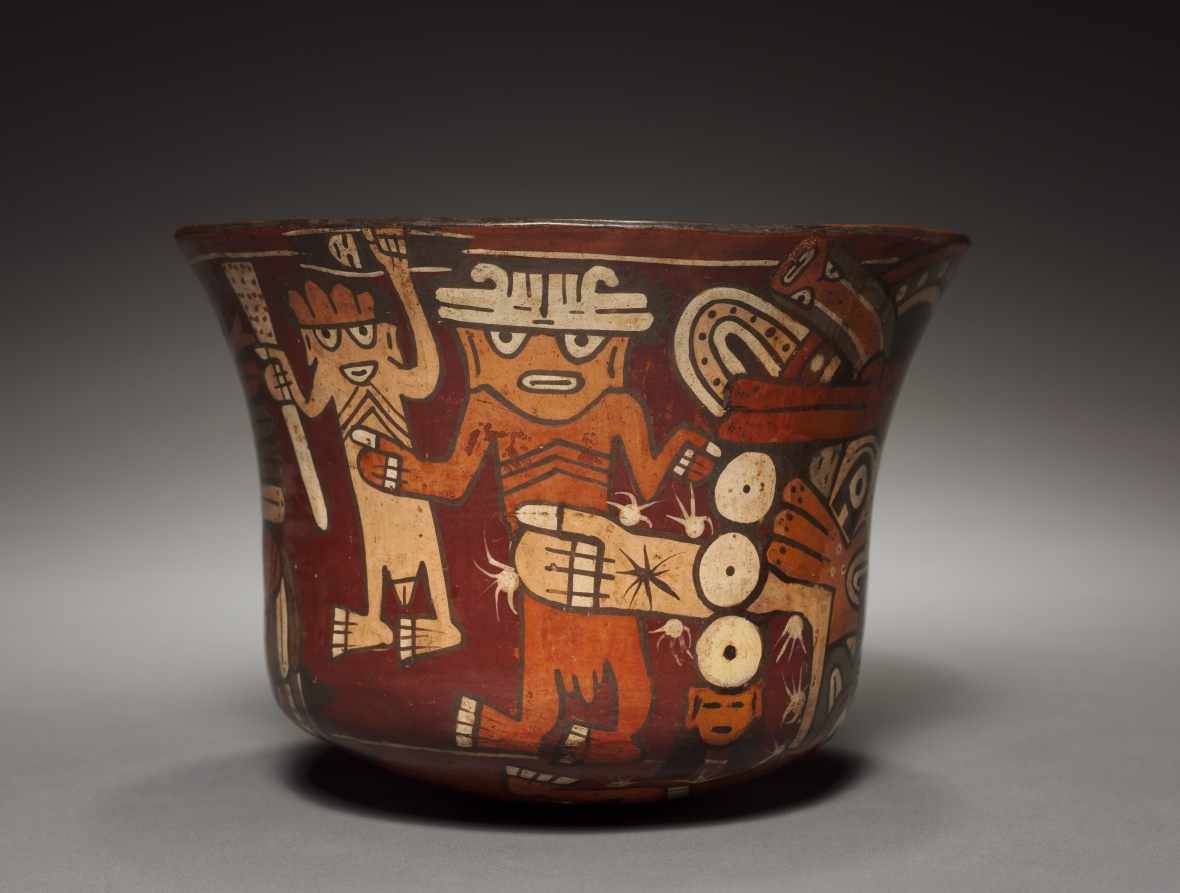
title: Bowl with Costumed Being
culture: Peru, South Coast, Nasca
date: 100 BCE–700 CE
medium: earthenware with colored slips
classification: Ceramic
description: Supernatural figures like the one on this bowl are shown wearing ornaments that actually exist-like the nearby Mouth Mask-they may represent humans clothed as deities who served as living cult images during rituals. The figure holds a severed head that probably alludes to capture of an enemy’s life force, since severed heads and fertility are linked in Nasca art.